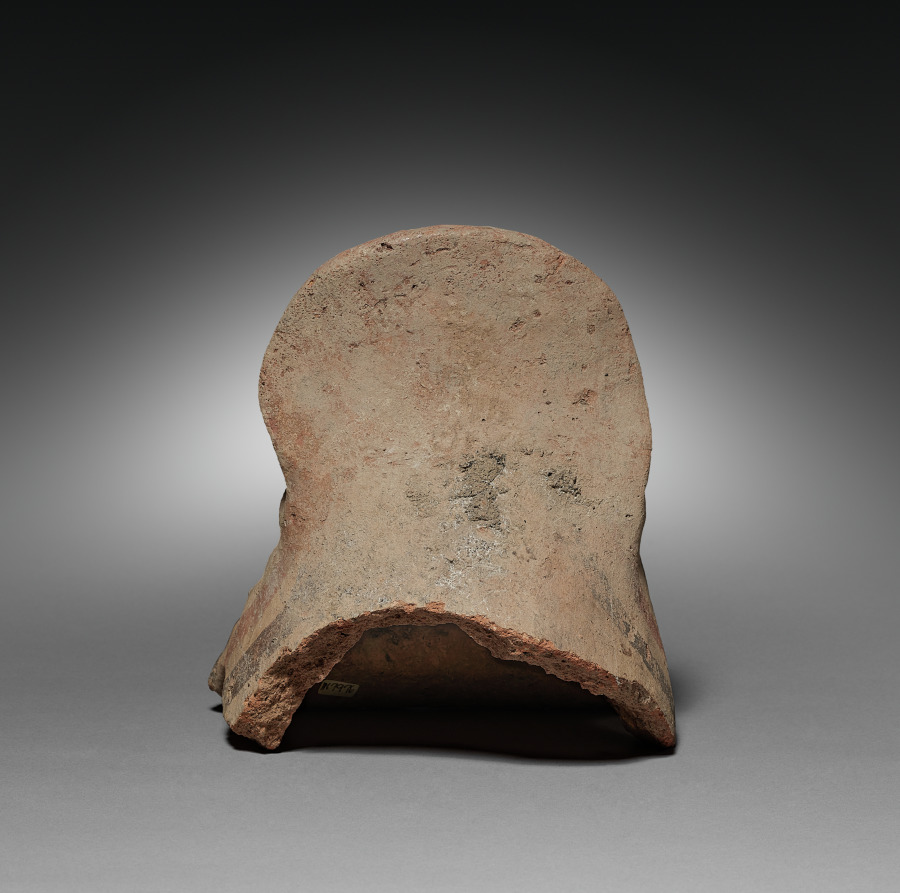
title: Antefix in the Form of a Maiden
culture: Etruscan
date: late 500s–early 400s BCE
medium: Painted terracotta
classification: Sculpture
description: Staring out with almond-shaped eyes and enigmatic smile, this brightly painted female head hides a rounded back made to serve an important function. She is a molded terracotta antefix, made to cap an open-ended roof tile along the sloping edge of a wooden building. Depending on the size of the structure it adorned, this antefix may have sat alongside dozens of others, likely all similar in form and painted decoration, and perhaps accompanied by additional polychrome architectural sculpture. Sometimes identified as maenads, the female followers of Dionysos (Etruscan Fufluns), such figures might also be nymphs or anonymous maidens.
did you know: Much Etruscan architectural sculpture was molded terracotta rather than carved stone.